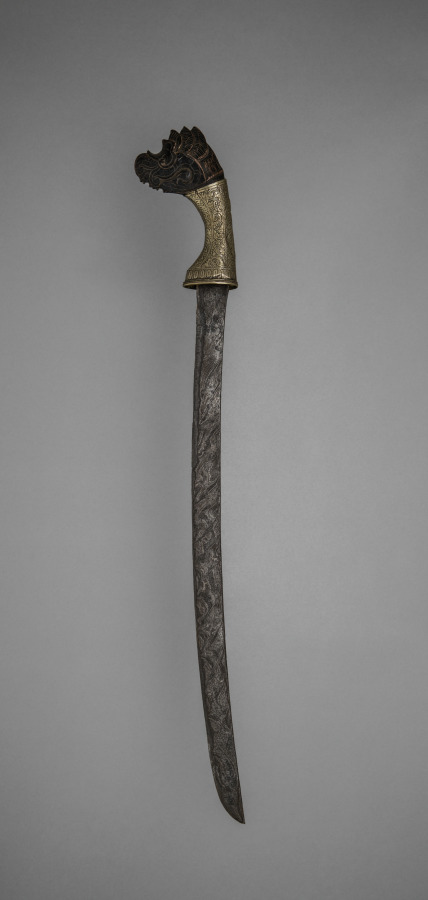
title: Sword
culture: Indonesia, Sulawesi (Celebes)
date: before 1916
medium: metal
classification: Arms and Armor